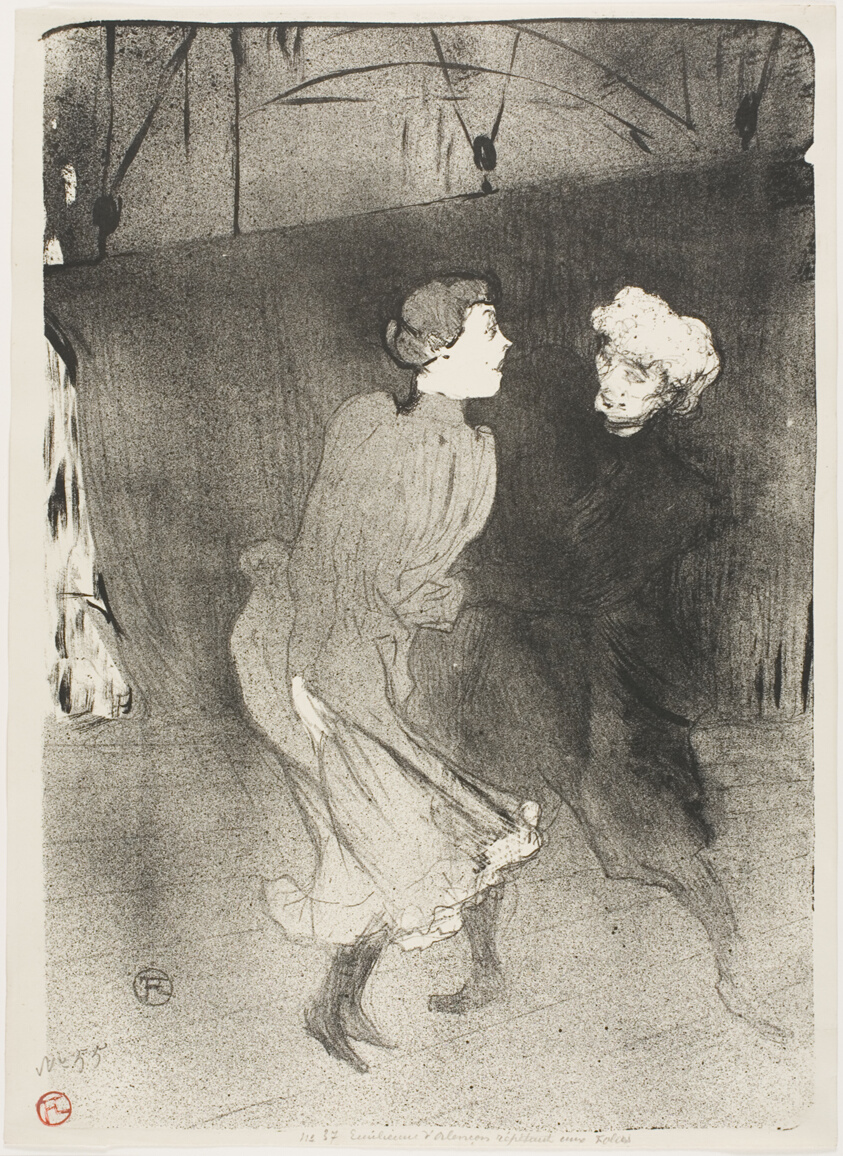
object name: Print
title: Rehearsal at the Folies-Bergère, Emilenne D'Alençon and Mariquita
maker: Henri de Toulouse-Lautrec (French, 1864-1901)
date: 1893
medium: Lithograph on cream wove paper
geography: France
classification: lithograph; print; prints and drawing